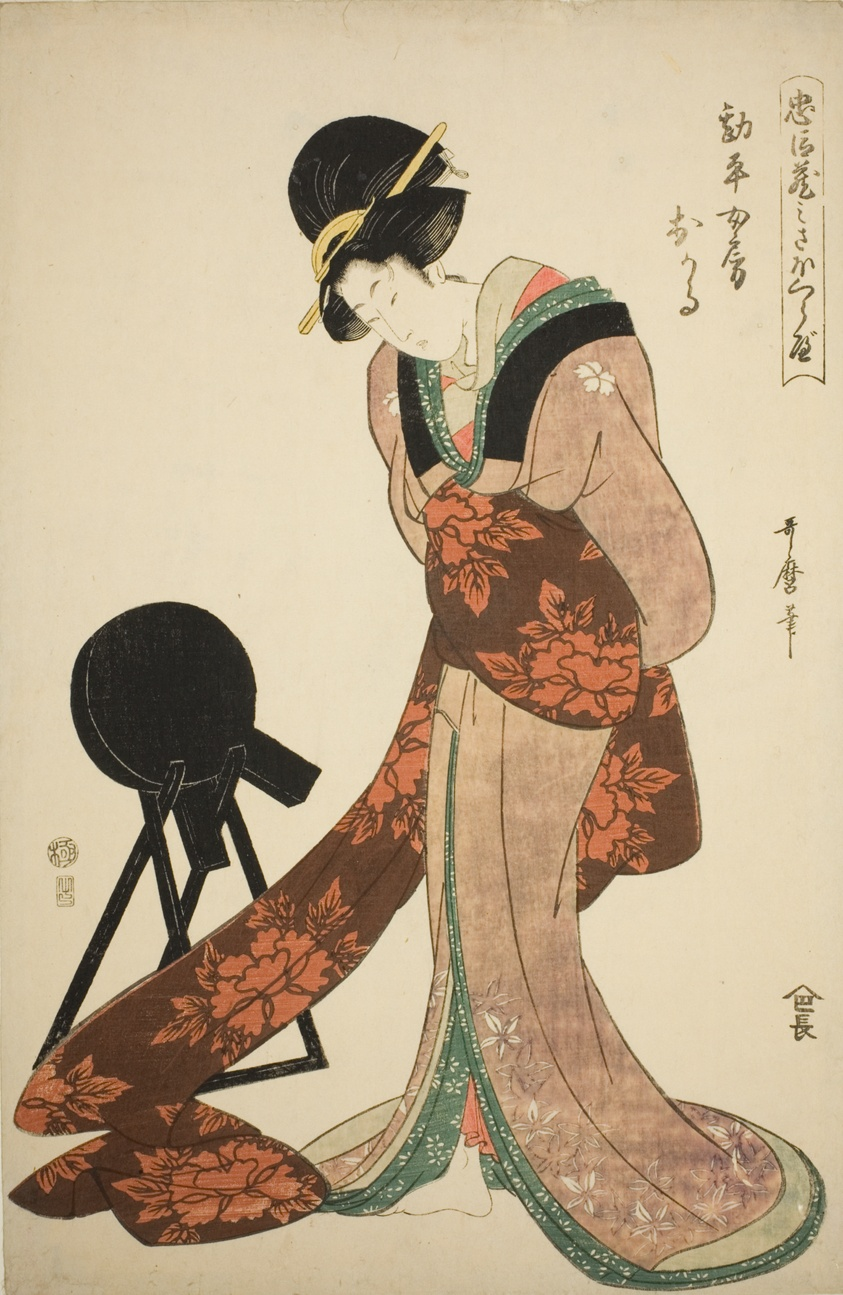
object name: Print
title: Kanpei's Wife Okaru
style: Japanese (culture or style)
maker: Kitagawa Utamaro 喜多川 歌麿; Japanese, 1753 (?)-1806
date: 1806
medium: Color woodblock print; oban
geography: Japan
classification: woodblock print; print; asian art